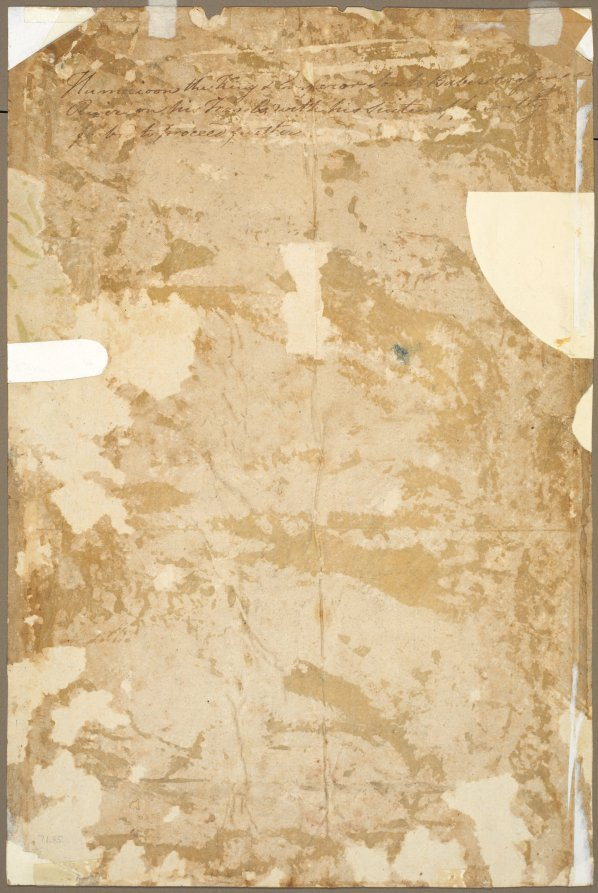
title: Babur meeting with Sultan Ali Mirza at the Kohik River, from a Babur-nama (Memoirs of Babur)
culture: India, Mughal school, 16th century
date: c. 1590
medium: Gum tempera and gold on paper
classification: Painting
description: Thirty years before he captured Delhi and founded the Mughal Empire, Babur began his expansionist activities at the age of 13, as depicted in this painting of an encounter that took place in 1496. Having traveled long distances across harsh dry terrain, Babur confronted one of his rivals who, like him, was angling to march on and conquer the illustrious city of Samarkand, the former capital of his ancestor Timur.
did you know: Camels carry collapsed tents to be pitched for nightly encampments and parties.